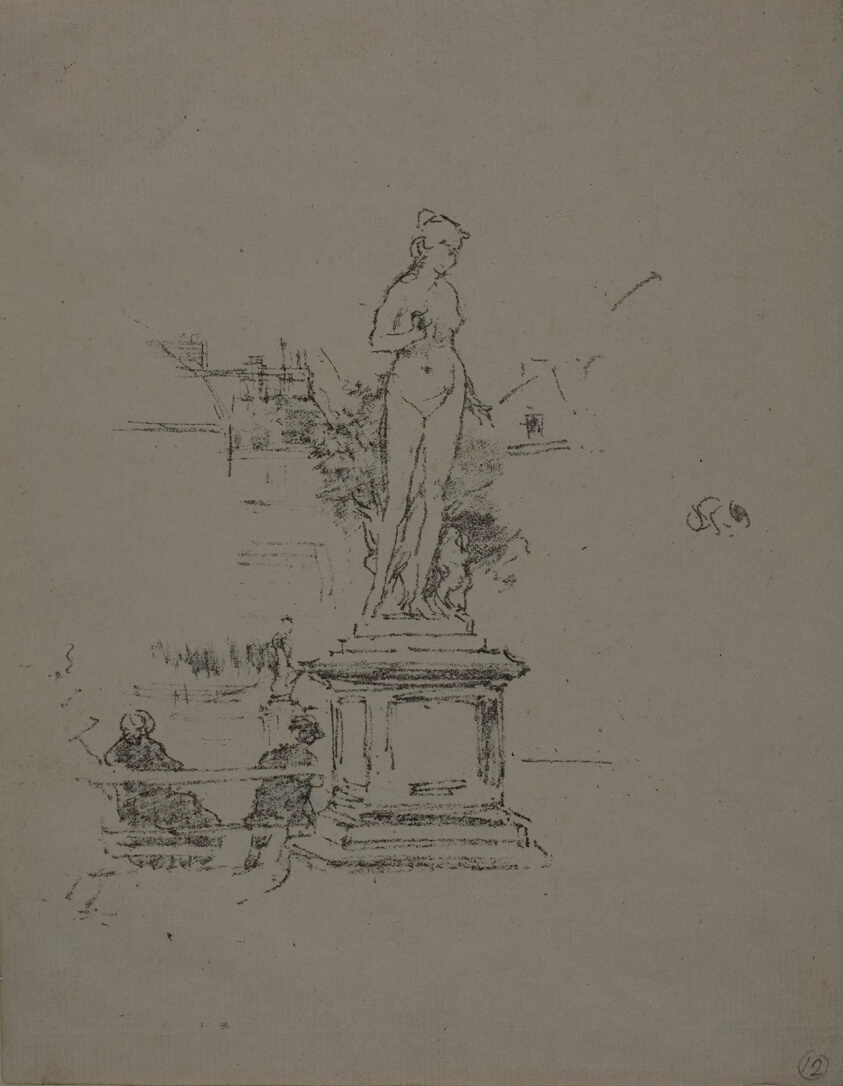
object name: Print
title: The Statue, Luxembourg Gardens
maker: James McNeill Whistler (American, 1834-1903)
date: 1894, printed posthumously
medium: Transfer lithograph in black on cream laid paper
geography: United States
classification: transfer lithograph; lithograph; print; prints and drawing; paper